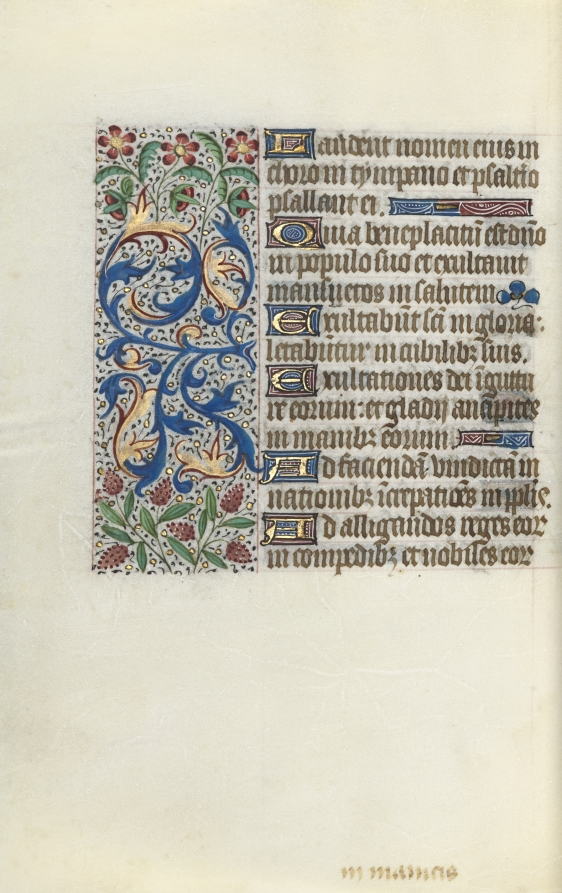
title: Book of Hours (Use of Rouen): fol. 142v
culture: France, Rouen, 15th century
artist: Master of the Geneva Latini (French, active Rouen, 1460–80)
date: c. 1470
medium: ink, tempera, and gold on vellum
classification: Bound Volume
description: In the late 1400s and early 1500s Rouen was an established and important center of book production. The city’s cathedral had a wealthy chapter that spent large sums of money to commission books and to maintain its extensive library. The stationers and booksellers would have likely been concentrated in or near the cathedral precinct. This artist, named after a manuscript now in Geneva, was Rouen’s principal illuminator during the second half of the 1400s.